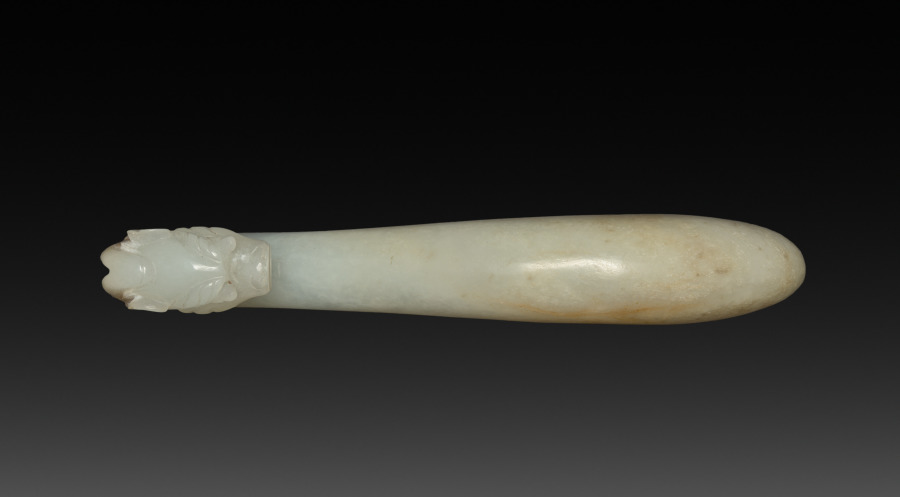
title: Belt Hook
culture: China, Qing dynasty (1644-1911)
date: c. 1700s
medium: jade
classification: Jade